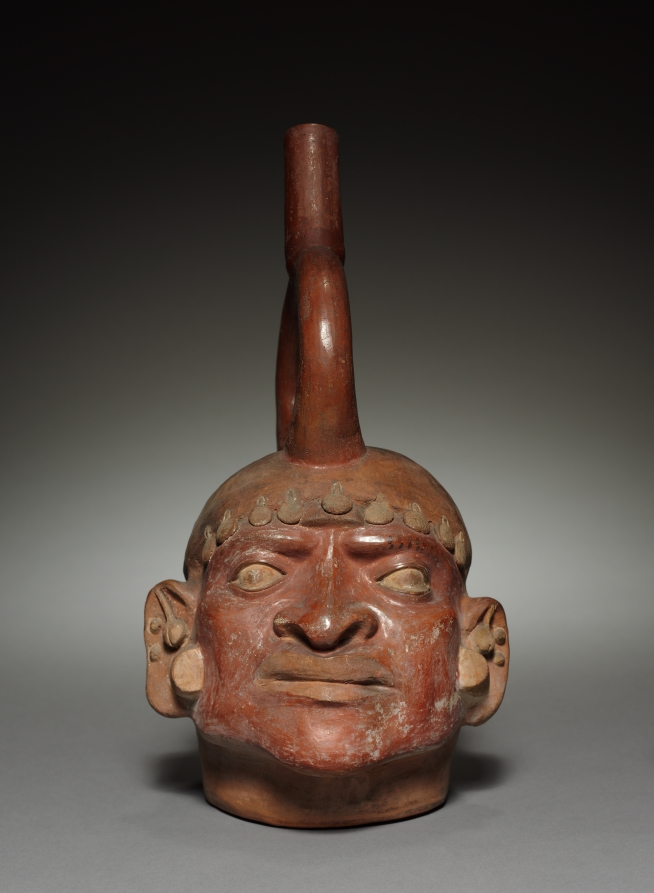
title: Bottle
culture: Peru, Mochica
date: before 1930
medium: pottery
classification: Ceramic